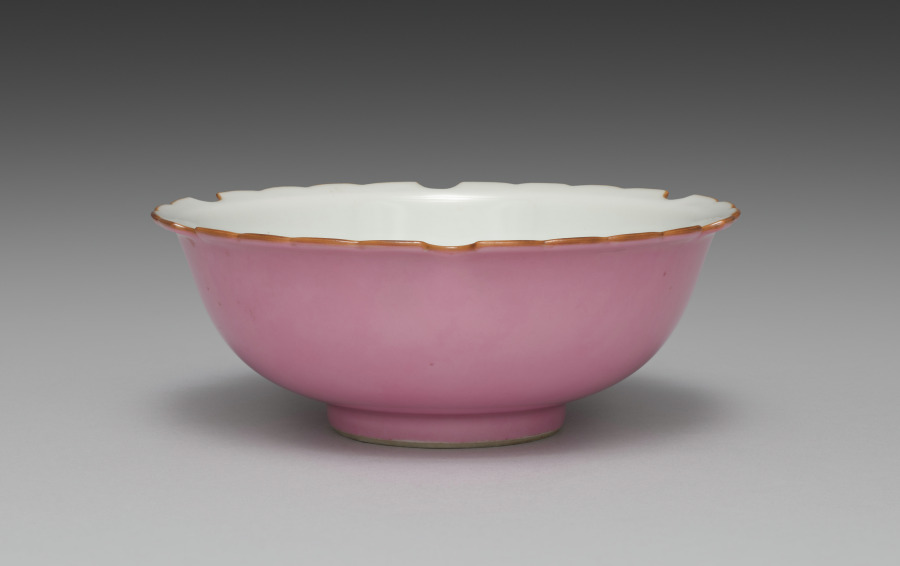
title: Dish from Snow-Flake Side Dishes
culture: Japan, Meiji period (1868–1912)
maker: Seifū Yohei III (Japanese, 1851–1914)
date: 1893–1914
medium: One from a set of six porcelain dishes; porcelain with lobed rims and pink glaze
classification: Ceramic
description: According to the box lid, this set of six side dishes, or mukōzuke, are “snow-flower style” (sekkashiki), having mouths shaped like snowflakes. Their mouths, which have six lobes and scalloped edges, are traced with brown iron oxide at the rim. The outside of each bowl is glazed with a very bright pink over the basin and foot, and the inside is left white. From directly above, one sees a snowflake-like shape, and from the side, they seem to float above a rosy ground.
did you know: The box for this set of dishes has an inscription on the side noting that they were for a person with the family name Nakamoto.